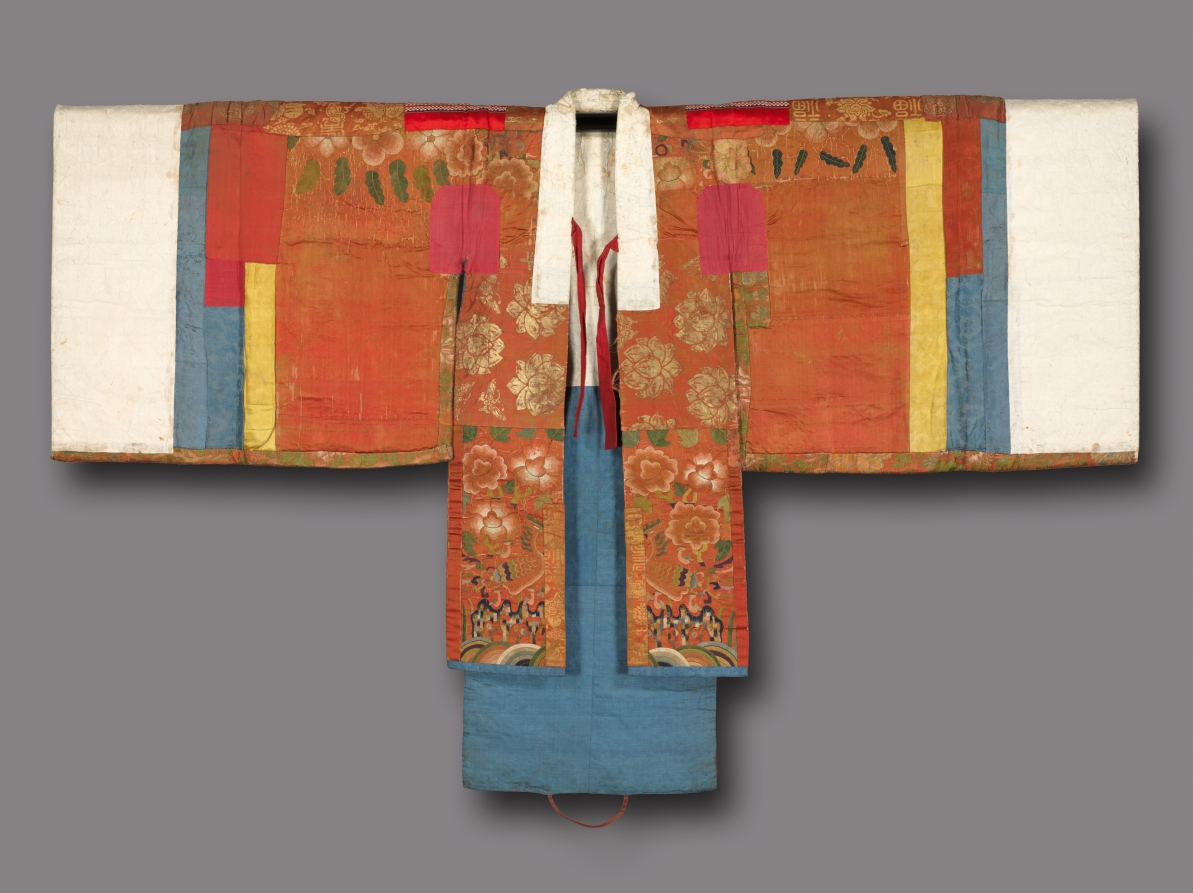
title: Bridal Robe (Hwarot)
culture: Korea, Joseon dynasty (1392–1910)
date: 1850–1910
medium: Satin weave silk; silk embroidery; paper edging on neck and sleeves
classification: Garment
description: This bride's robe is exquisitely embroidered with various symbols of happiness in colorful silk threads. Butterflies stand for marital happiness; the phoenix, numerous offspring; and lotus flowers and white cranes, longevity. Yet, the bridal robe does not attest to the life of luxury. To the contrary, many traces of repairs, trimmings, and patchwork reflect Joseon period women’s commitment to value neo-Confucian aesthetics of frugality and modesty. Substantial repairs and patching reveal that this robe served as an important communal resource to be shared and passed down through several generations. Its collar and sleeves are covered in thick white paper; this paper is replaced with new paper for each bride, while the robe itself was reused for decades.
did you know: This bride's robe was not made for one specific bride, but rather was shared and passed down to many brides.